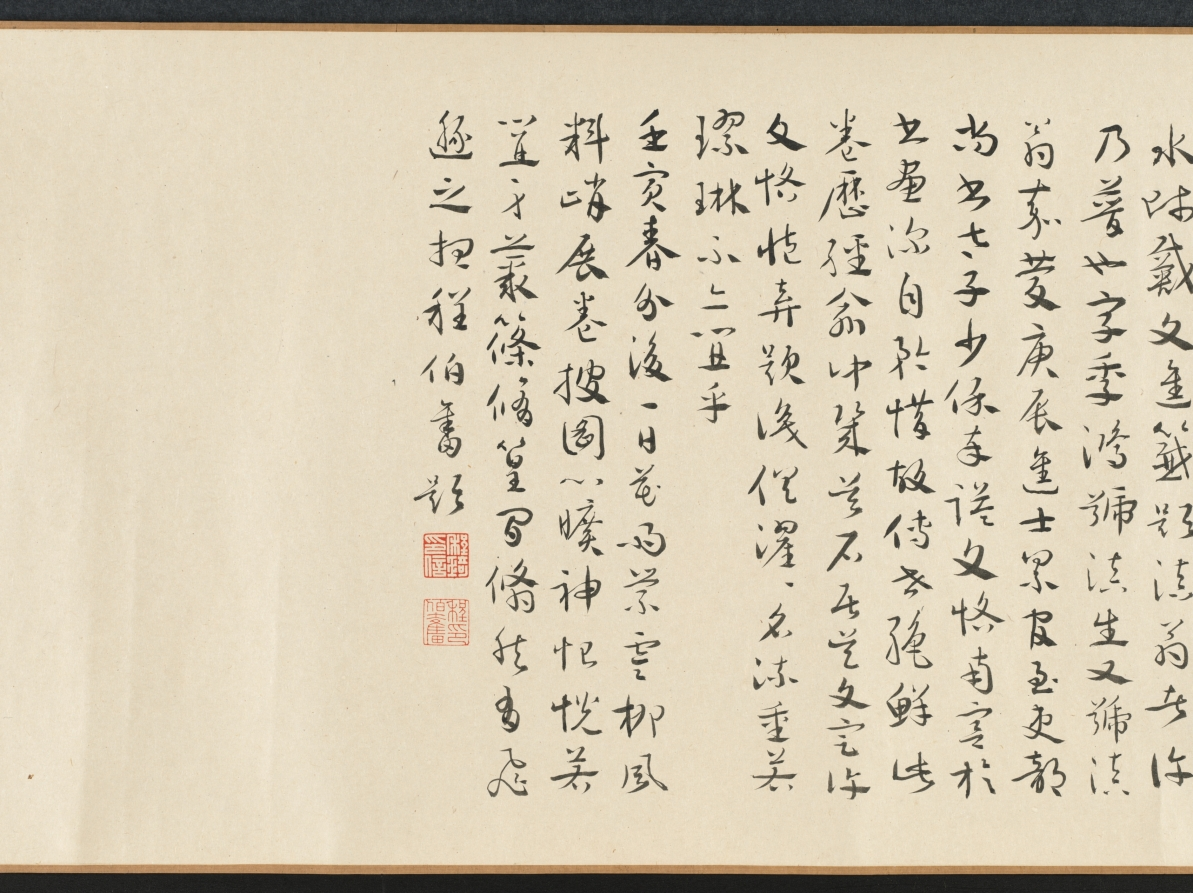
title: Landscape with Bamboo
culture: China, Yuan dynasty (1271-1368)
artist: Song Ke (Chinese, 1327–1387)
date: 1300s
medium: Handscroll; ink on paper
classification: Painting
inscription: 東吳宋克戲為仲幾畏友圖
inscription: 2 colophons and 14 additional seals: 1 seal of Yü Chung-chi (14th c.); 1 seal of Wu Ch'eng (1469 jinshi); 1 colophon and 2 seals of Wu K'uan (1435–1504); 1 colophon and 9 seals of Cheng Qi (1911–1988); 1 seal unidentified.